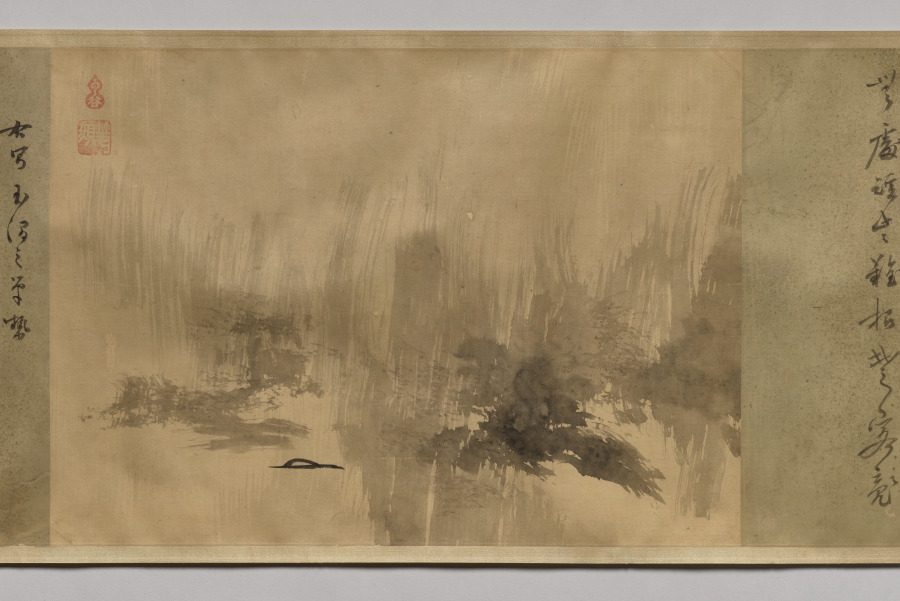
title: Poems and Pictures of the Eight Views of Xiao-Xiang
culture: Japan, Momoyama period (1573–1615)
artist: Unkoku Tōgan (Japanese, 1547–1618)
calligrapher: Inkei Gentetsu (Japanese, 1562–1612)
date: 1605–12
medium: Handscroll; ink on paper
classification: Painting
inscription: Each painting sealed with red gourd-shaped seal reading Unkoku (雲谷) and a square seal reading Tōgan (等顔).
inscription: Each painting prefaced with a titled poem on the Eight Views of Xiao-Xiang by Yujian Ruofen (active late 13th century) inscribed by Japanese Buddhist monk Inkei Gentetsu (1562–1612).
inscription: 右寫玉㵎之筆勢／雪舟末葉等顔筆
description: Unkoku Tōgan brushed these scenes using the splashed-ink technique associated in Japan with the Chinese monk Yujian Ruofen (active late 1200s). Xiao-Xiang refers to the region in present-day Hunan province, where the Xiang River and its tributaries converge. Each of the eight views evokes a time of day or season. The earliest surviving series of Xiao-Xiang paintings is by Wang Hong (active mid-1100s), but textual evidence tells us the theme appears earlier. It was later adopted in Japan and Korea, as seen here. The poems were inscribed by Inkei Gentetsu, the third abbot of the Rinzai Zen temple Tōshunji, Japan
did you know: The “Tō” of Tōgan comes from the name of painter Sesshū Tōyō (1420–1506).